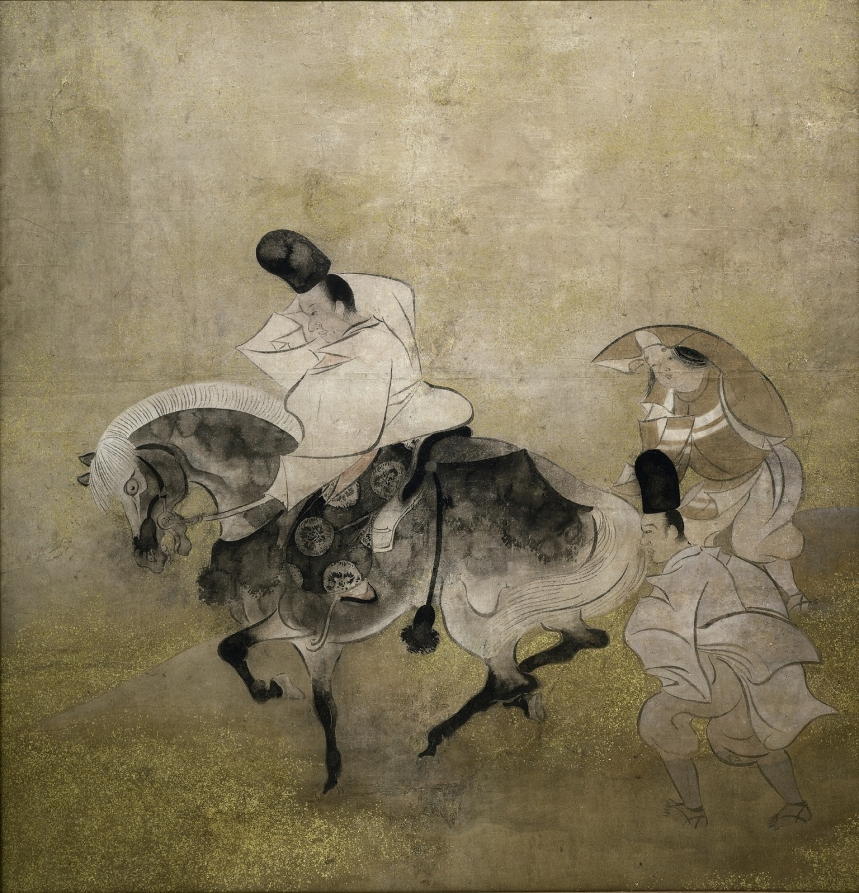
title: Crossing at Sano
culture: Japan, Edo period (1615–1868)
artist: studio of Tawaraya Sōtatsu (Japanese, c. 1570–c. 1640)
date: c. 1600–1640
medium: Hanging scroll mounted as a single-panel screen; ink, color, and gold on paper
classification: Painting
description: Like many paintings from the Sōtatsu studio, a Kyoto-based atelier that ran the shop Tawaraya, this one is done in ink, mineral colors, and gold, and is formally reminiscent of 12th- and 13th-century paintings associated with the Japanese aristocracy. It depicts a man on horseback with two attendants crossing a bridge that once spanned the Kino River in Sano in eastern Wakayama Prefecture. The composition was inspired by a poem by Fujiwara no Teika (1162–1241) that translates as follows: I stop my horse, but there is no shelter as I brush off my sleeves at Sano Crossing in the evening snow.